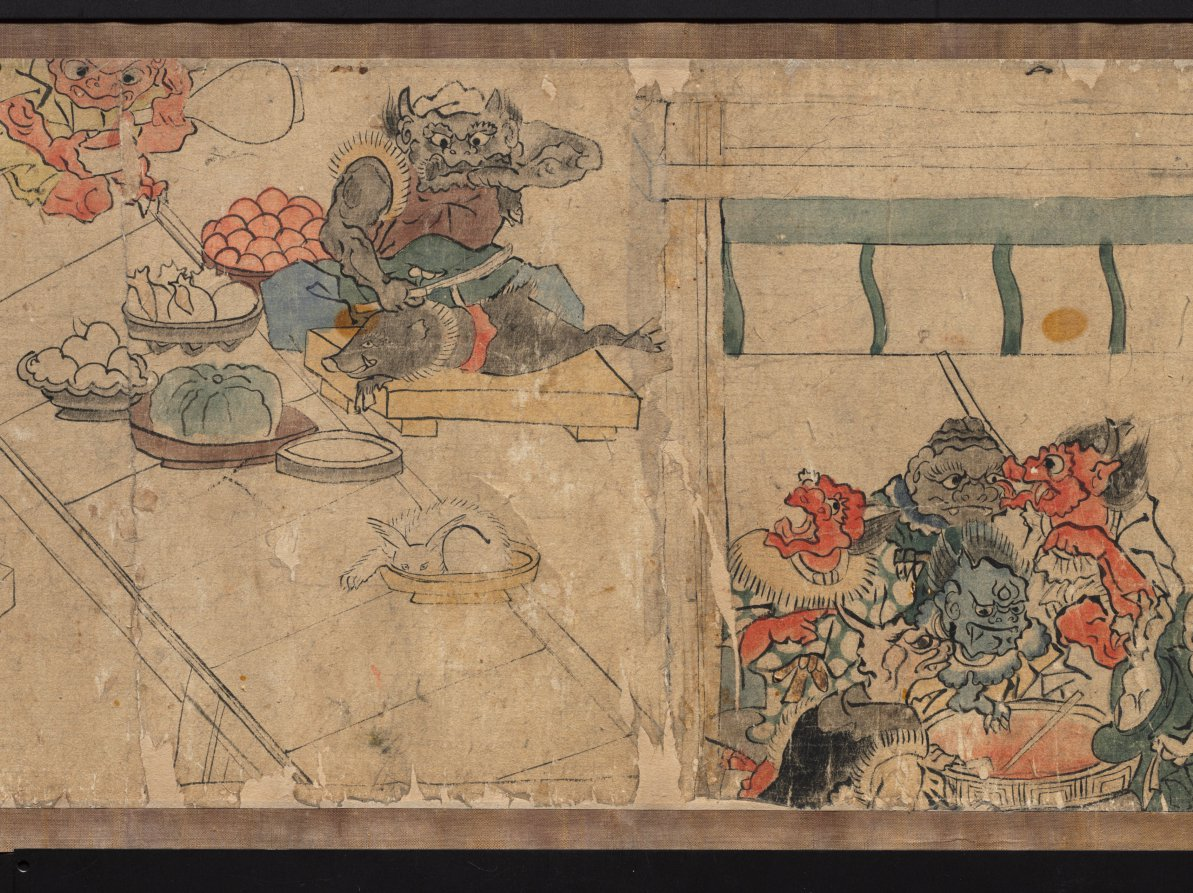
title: Oeyama Engi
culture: Japan, Edo period (1615–1868)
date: 1615–1868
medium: one of a pair of handscrolls; ink and color on paper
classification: Painting